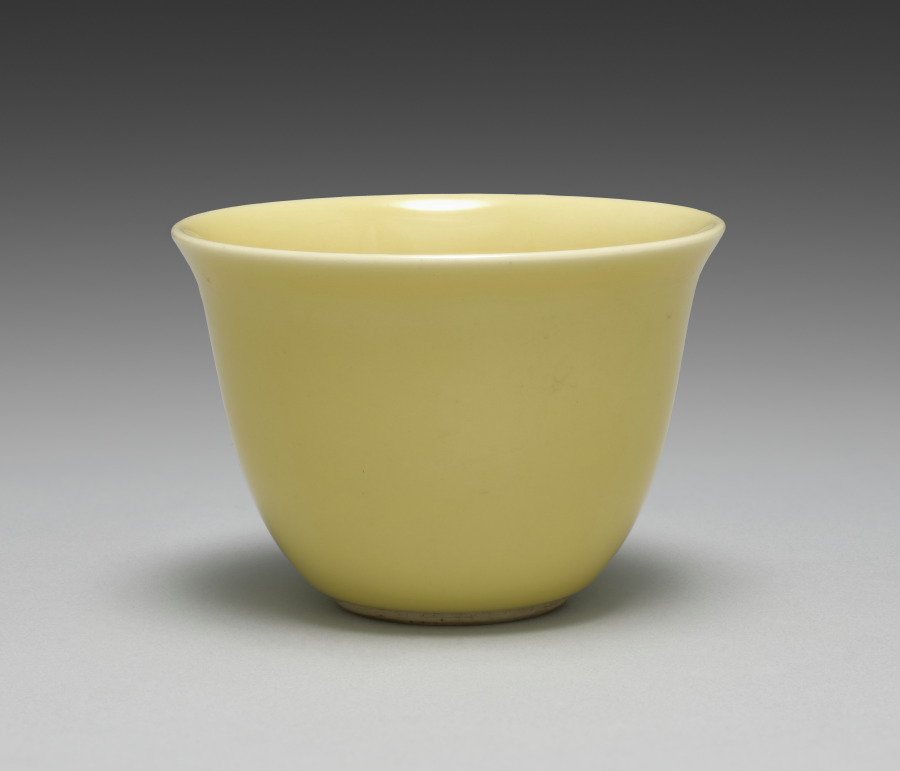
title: Cup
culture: Japan, Taishō period (1912–26) or Shōwa period (1926–89)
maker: Seifū Yohei IV (Japanese, 1872–1951)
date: 1914–46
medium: porcelain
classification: Ceramic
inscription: 清風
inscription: 清風造 【印】成山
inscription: 清風盧人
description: Like his father, Yohei IV also produced works with red or yellow monochrome glazes. His yellow-glazed works include this set of five drinking cups, a pair of sake pourers CMA 2022.216, and a sweets bowl molded into the shape of a chrysanthemum CMA 2022.218.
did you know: Seifū Yohei IV learned the ceramics industry from his father and painting from Tanomura Shosai.